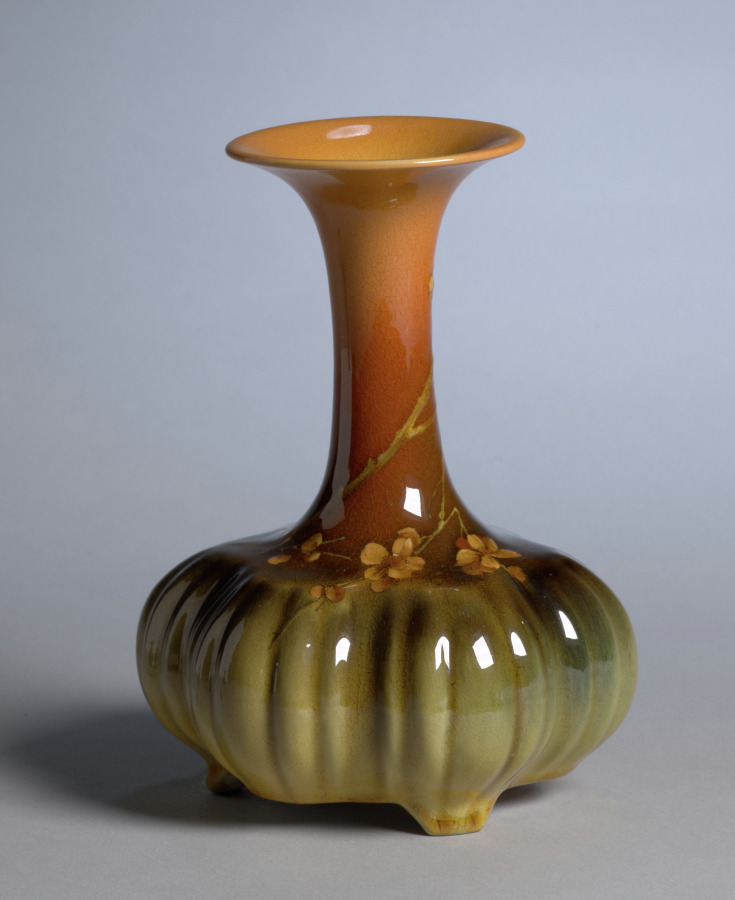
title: Vase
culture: America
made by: Rookwood Pottery Company (American, established 1880)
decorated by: possibly by Constance Amelia Baker (American)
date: 1890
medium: earthenware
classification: Ceramic